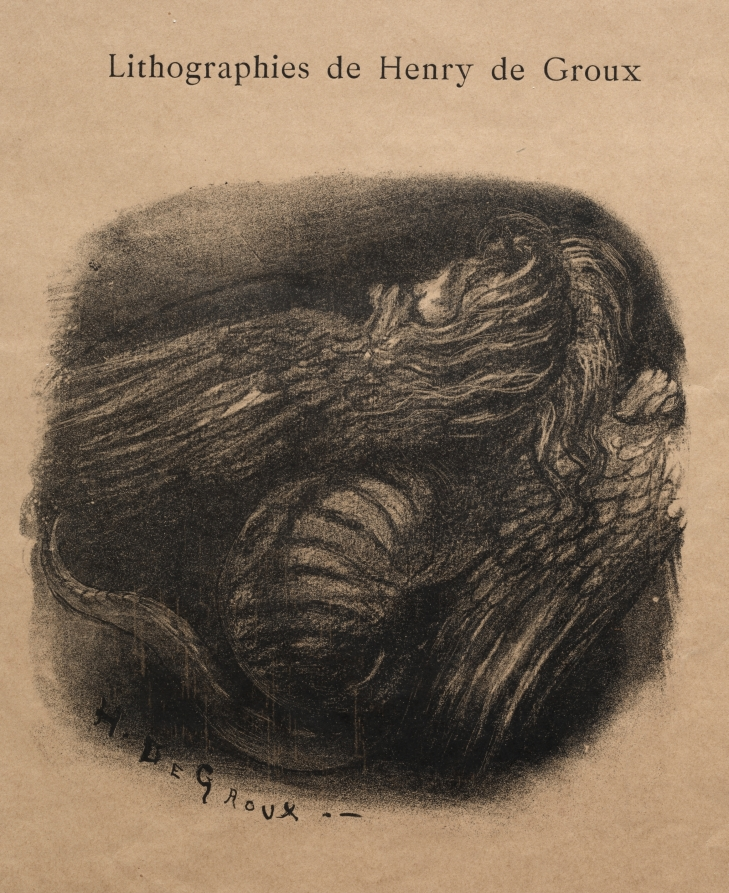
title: The Vintages!: Title Page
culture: Belgium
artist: Henri de Groux (Belgian, 1867–1930)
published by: Proof from an unpublished suite of lithographs intended to be published by L'Estampe Originale, 17, rue de Rome.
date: 1894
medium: lithograph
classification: Print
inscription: signed in stone: "H. de Groux"